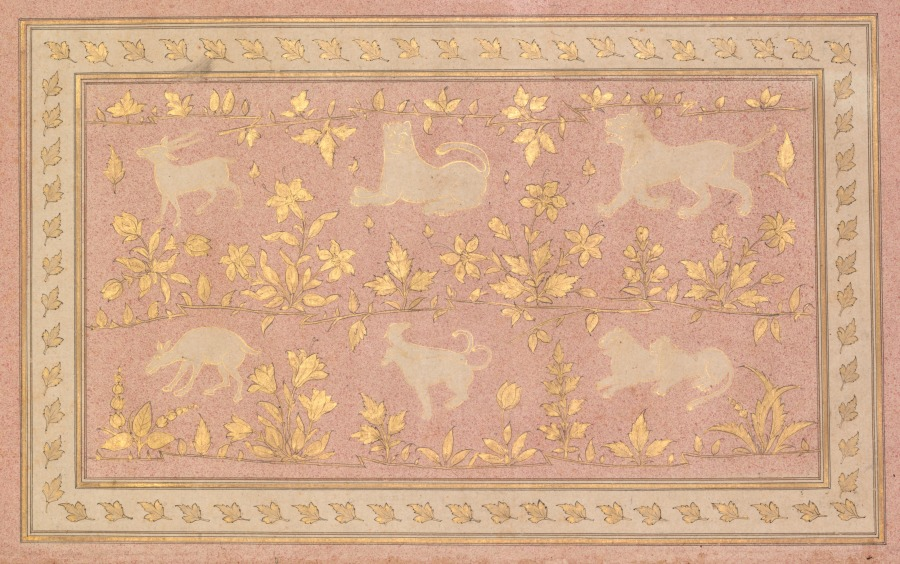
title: Stenciled Scenes of Lion and Gazelle (verso)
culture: Mughal India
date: c. 1710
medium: Gum tempera, ink, and gold on paper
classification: Painting